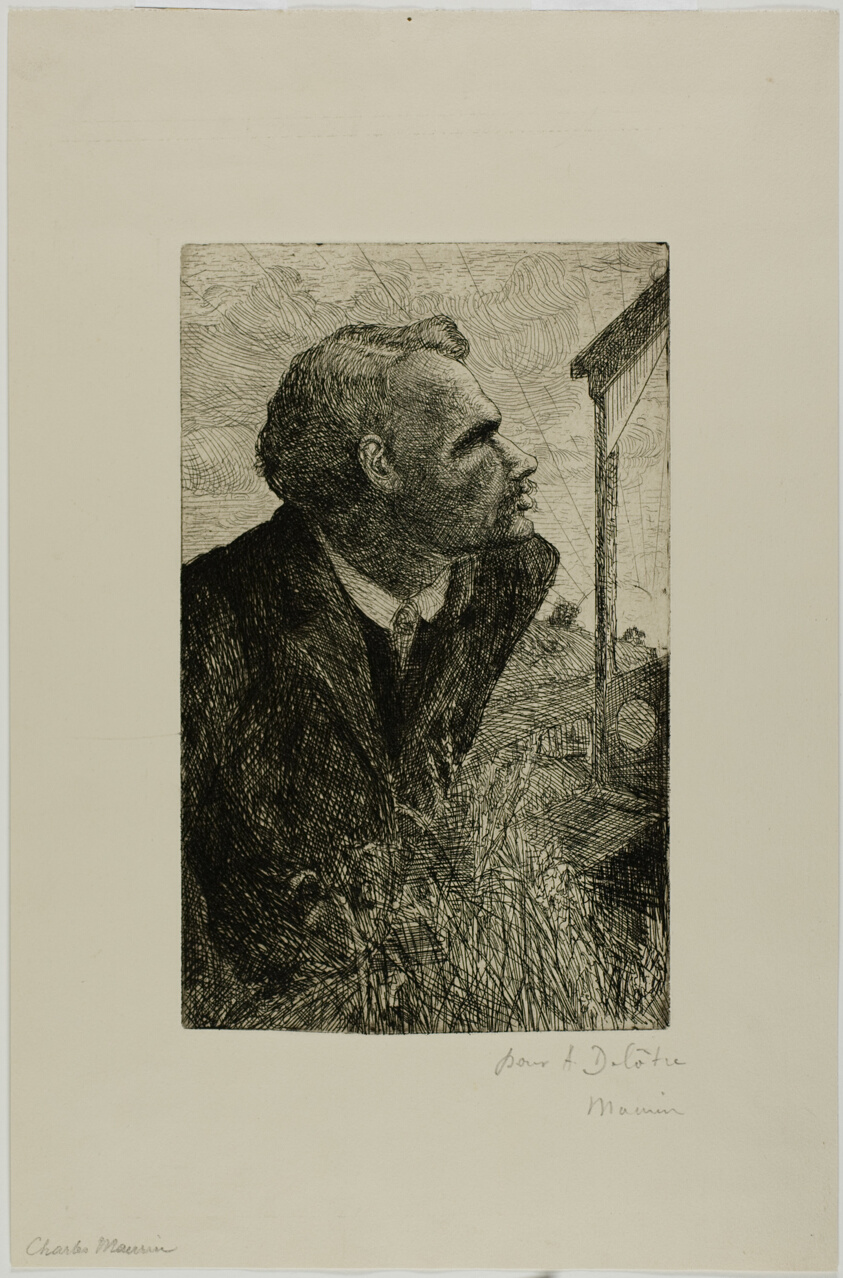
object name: Print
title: Portrait of François Claudius Ravachol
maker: Charles Maurin (French, 1856-1914)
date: c. 1892–94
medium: Etching on cream wove paper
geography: France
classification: prints and drawing; etching; print